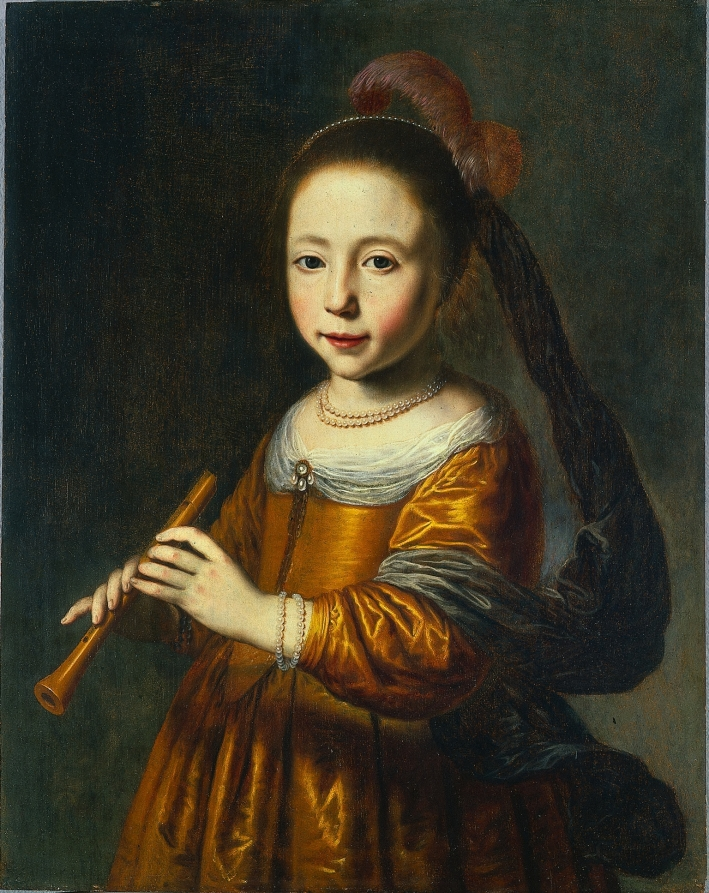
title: Portrait of Elizabeth Spiegel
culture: Netherlands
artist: Dirck Dircksz. Santvoort (Dutch, 1610/11–1680)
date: 1639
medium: oil on wood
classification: Painting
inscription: Inscribed on back: "Elisabet Spiegel"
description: This painting belongs to a series of portraits representing the five senses and each depicting a daughter of a wealthy family from Amsterdam. This portrait of 11-year-old Elizabeth Spiegel, who holds a recorder in her hands, represents the sense of hearing. Her gown of costly satin and pearl ornaments proclaims her family's prosperity, and the imported ostrich feathers from Africa indicate Amsterdam's role as an international trade center.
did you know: Amsterdam was a very important trade center when this portrait was painted in the mid-1600s. In this portrait, the girl wears an African ostrich feather in her hair and her skin appears to glow. Look closely at the way her small hands were treated and the naturalistic way they grip the musical instrument.